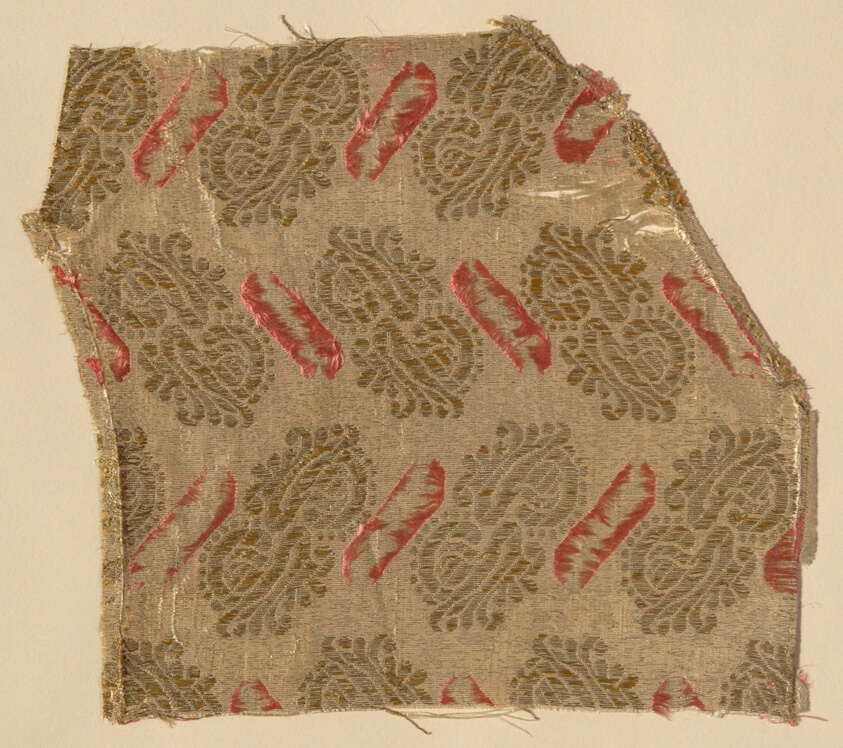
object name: Textile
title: Fragment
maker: Italy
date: 1625/75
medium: Silk, silver gilt strips, and gold gilt strips wound around silk fiber core, plain weave with supplementary patterning and supplementary brocading wefts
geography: Italy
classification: textile; weaving